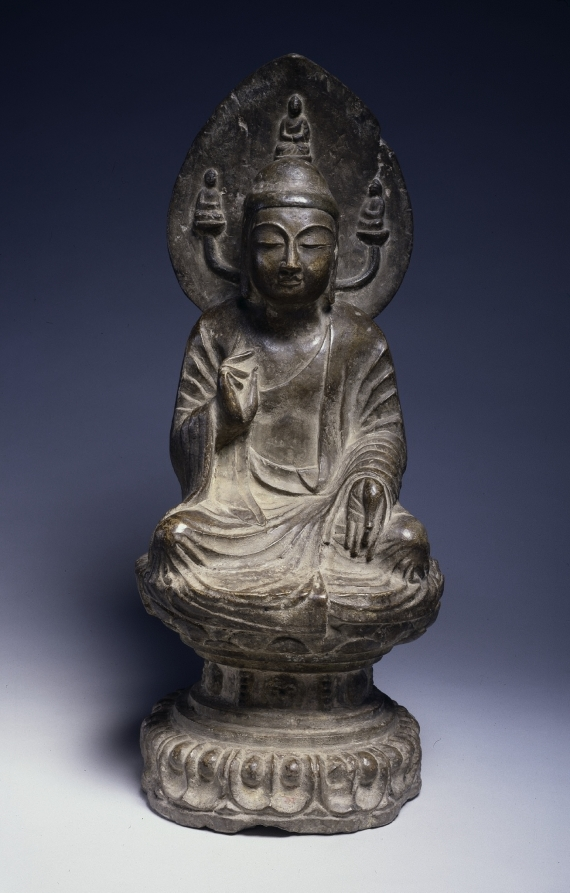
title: Amida Buddha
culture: China, Sui dynasty (581-618)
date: 581–618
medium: limestone with traces of polychromy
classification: Sculpture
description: The leaf-shaped halo of this seated Buddha bears the rare, unusual icon of the three nirmana Buddhas, which represents a symbolic homage of the Buddhas of the past, the present, and the future—manifestations of the Buddha in infinite time and space. Another interpretation is that the three figures without halos represent souls reborn in the Western Paradise thanks to Amida Buddha's divine intervention.